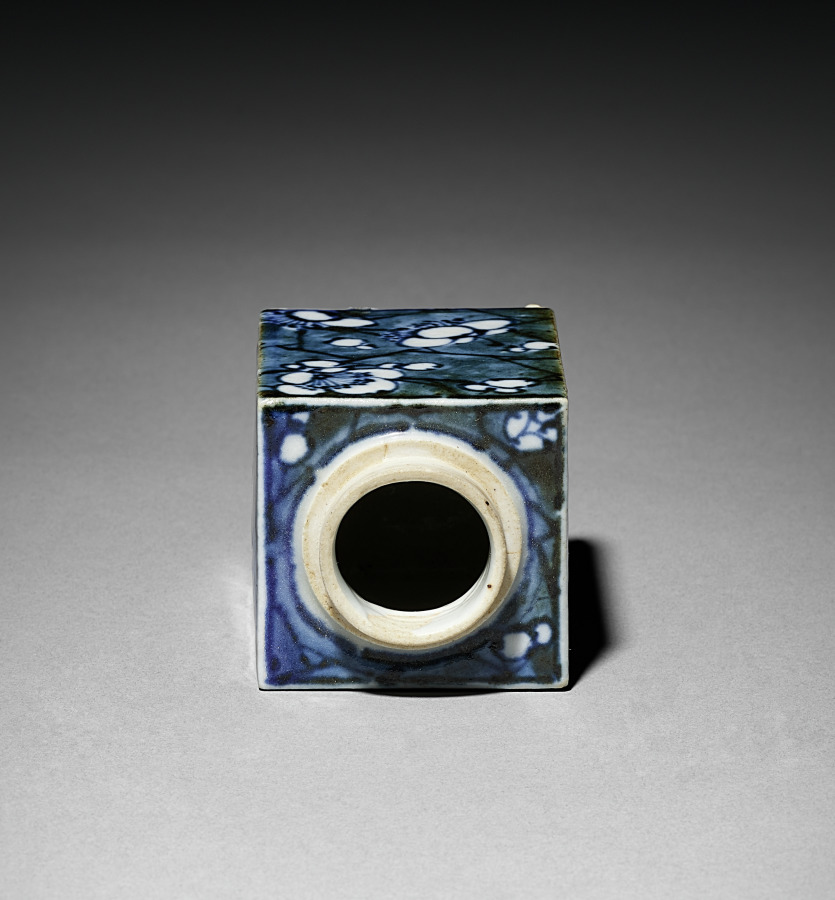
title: Tea Container with Plum Blossoms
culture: Japan, Edo period (1615–1868)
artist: Aoki Mokubei (Japanese, 1767–1833)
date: early 1800s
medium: porcelain with underglaze blue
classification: Ceramic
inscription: signed "Ro Mokubei" on base in underglaze blue.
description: Aoki Mokubei, born into a family of restaurateurs, was a potter, calligrapher, painter, and scholar, and is considered one of the three masters of later Edo period Kyoto ceramics. He specialized in porcelains fashioned after Chinese prototypes, and created works for steeped tea (sencha) such as these matching tea caddies decorated in an underglaze blue called sometsuke—literally “with applied dye.” He signed them on their bottoms. They also have intricately patterned silk sleeves to both beautify and protect them. On the exterior of the lid of the outer wooden box that contains them, it is written that Mokubei inscribed and painted an image on the box. On the interior of the lid, the signature and seals of a former owner are written. Mokubei has signed the lid of the inner box, and a charming ink and light color composition of West Lake in Hangzhou in China covers its three sides. On the fourth side is a long inscription by Mokubei describing the scene.